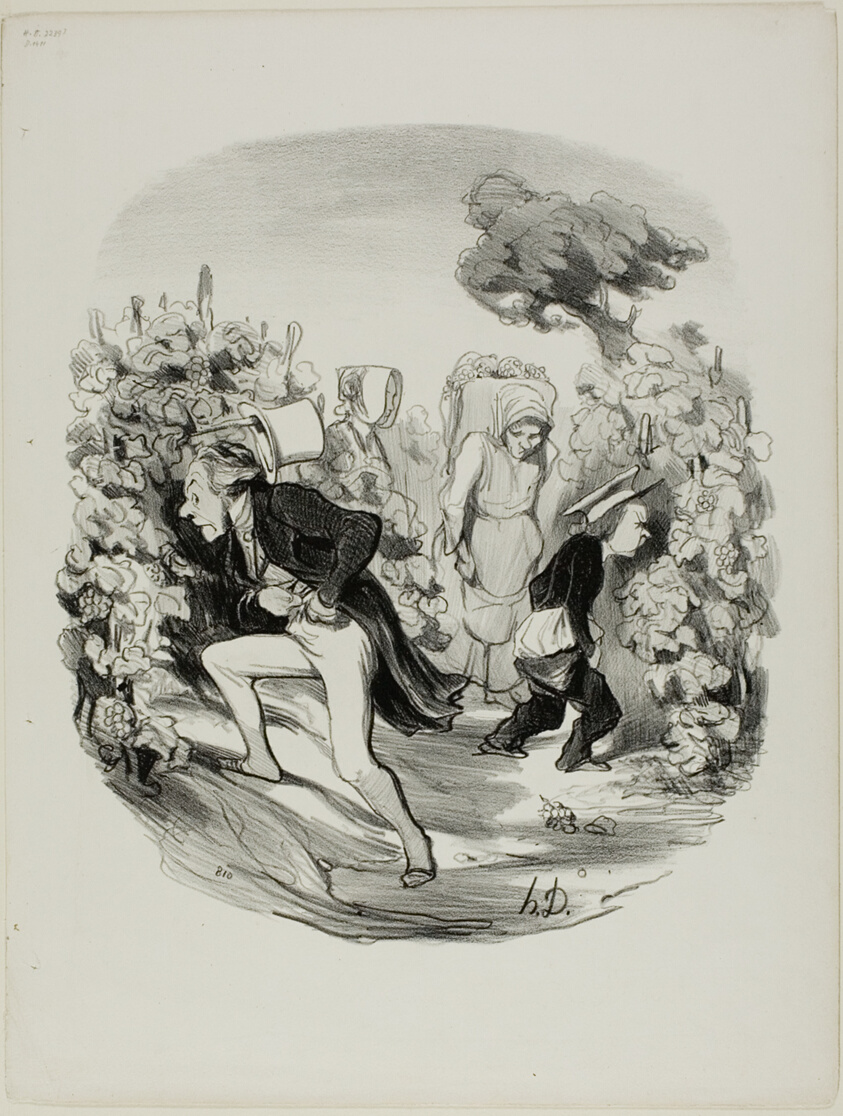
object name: Print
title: Oh Blast! ... the grapes really aren't good this year!, plate 24 from Pastorales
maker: Honoré Victorin Daumier; French, 1808-1879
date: 1845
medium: Lithograph in black on white wove paper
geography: France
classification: lithograph; print; prints and drawing